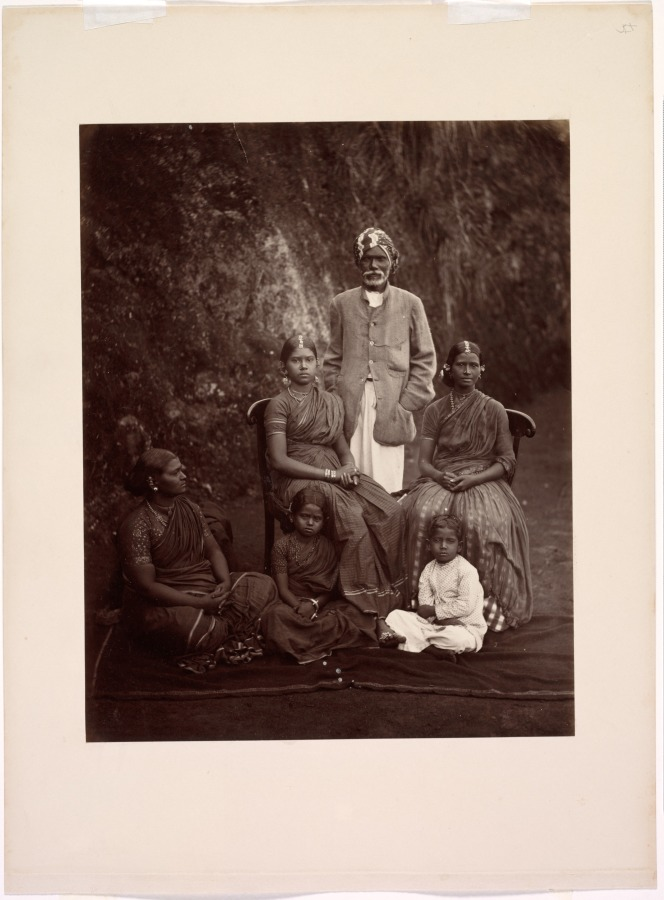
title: Untitled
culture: England, 19th century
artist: possibly by Skeen & Co. (British, active 1860–1920)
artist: possibly by Charles T. Scowen (British)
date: 1880s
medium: Albumen print, gold-toned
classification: Photograph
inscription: Scribbled in pencil on recto of mount: "5 [possibly 4, indecipherable handwriting]" Written in pencil on verso of mount: "550" Written in pencil on verso of mat: "W.L.H. Skeen (1860-1900)/CEYLON, 1880s/albumen print (gold toned)/1400 (Euros)/260 x 205 mm"